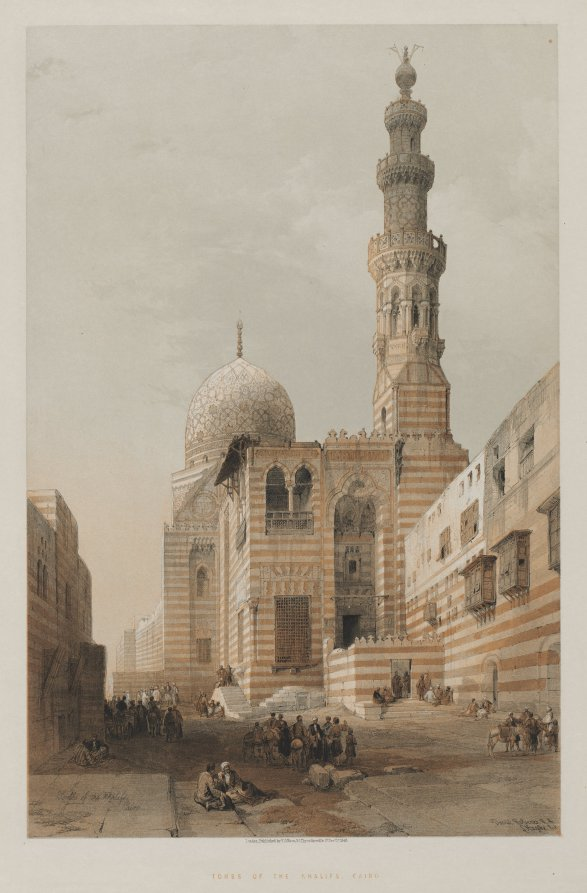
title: Egypt and Nubia, Volume III: Tombs of the Khalifs, Cairo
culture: England, 19th century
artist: Louis Haghe (British, 1806–1885)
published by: F. G. Moon, 20 Threadneedle Street, London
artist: after David Roberts (Scottish, 1796–1864)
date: 1848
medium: color lithograph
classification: Print